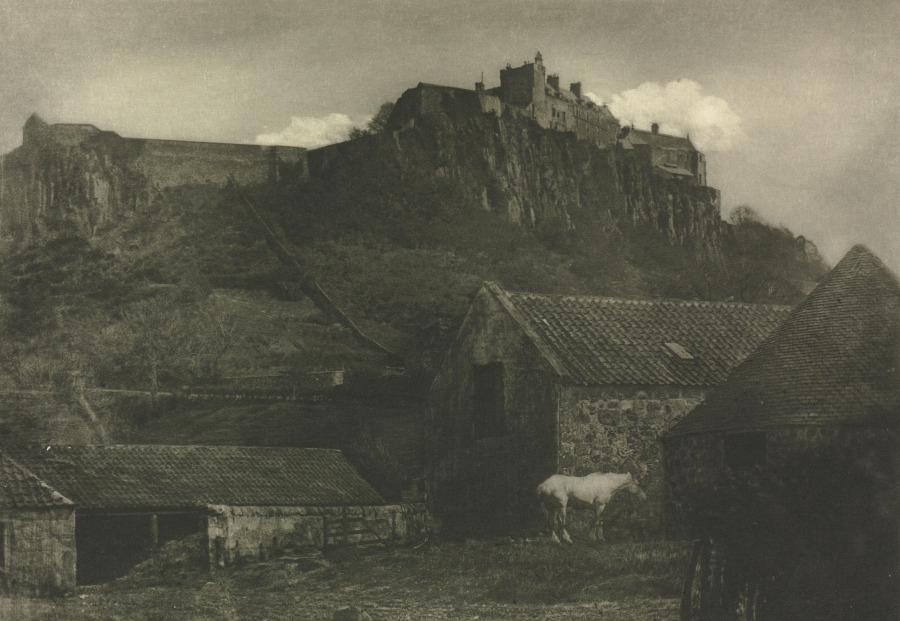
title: Camera Work: Stirling Castle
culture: England, 20th century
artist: J. Craig Annan (British, 1864–1946)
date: 1907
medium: photogravure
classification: Bound Volume